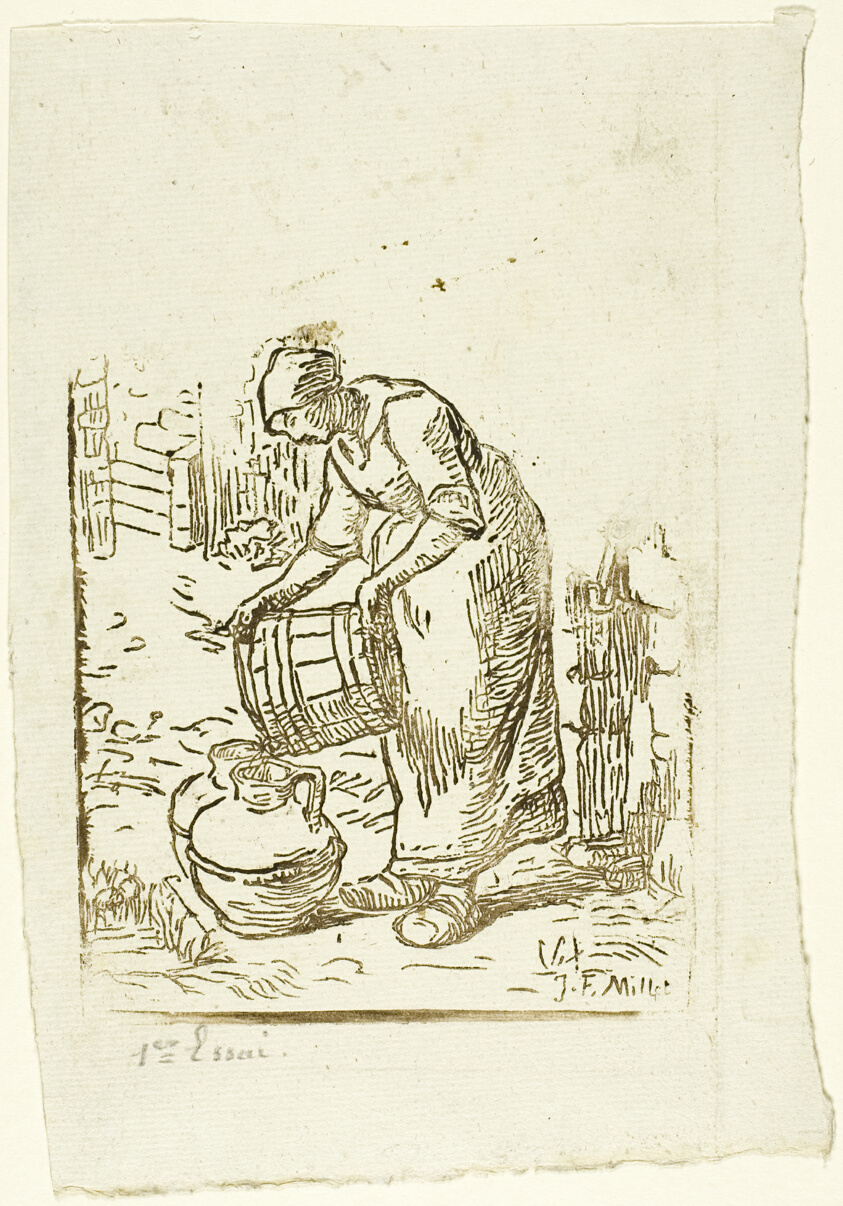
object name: Print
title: Woman Filling Water-Cans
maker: Pierre Millet (French, 1833-1914); after Jean François Millet (French, 1814-1875)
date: 1854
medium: Woodcut from a partially inked block in dark brown on ivory laid paper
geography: France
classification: woodcut; print; prints and drawing